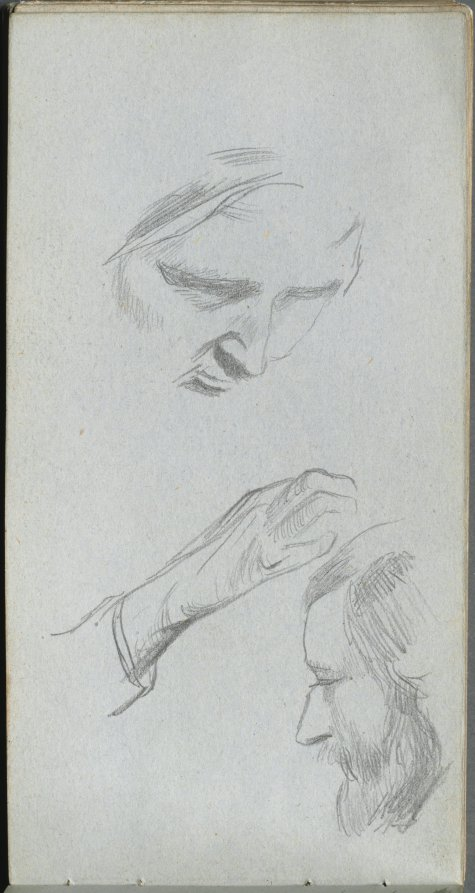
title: Sketchbook, page 70: Study of Two Faces and a Hand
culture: France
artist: Ernest Meissonier (French, 1815–1891)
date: c. 1860s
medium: graphite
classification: Bound Volume